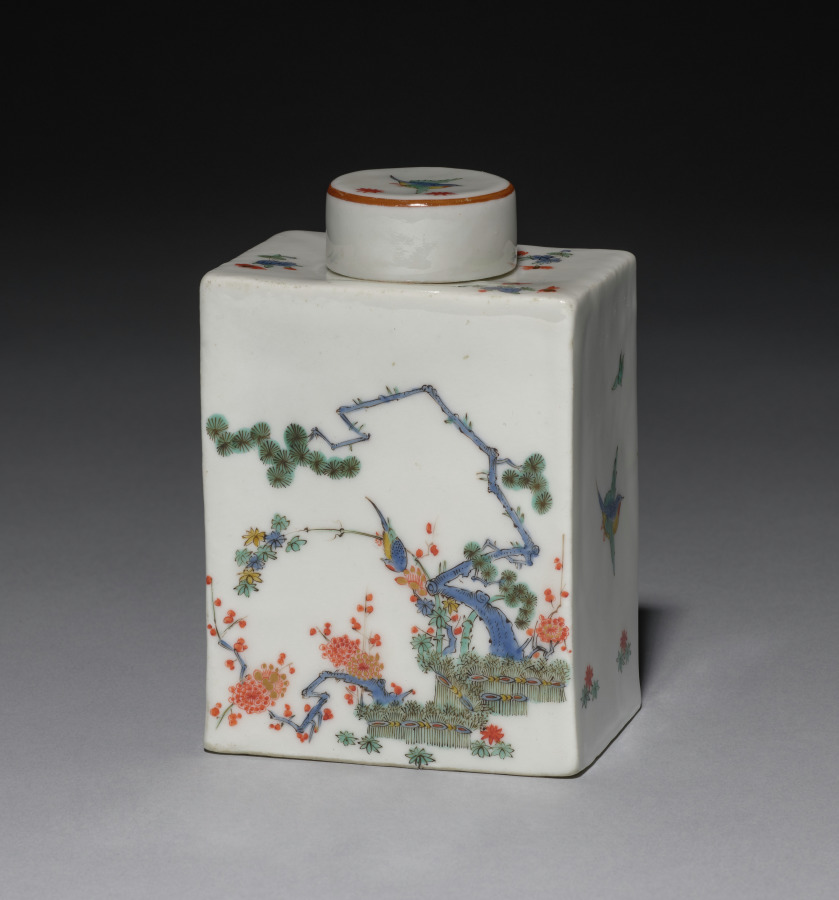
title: Tea Caddy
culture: Germany, Meissen, 18th century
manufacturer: Meissen Porcelain Factory (German, est. c. 1710)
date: c. 1735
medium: porcelain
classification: Ceramic